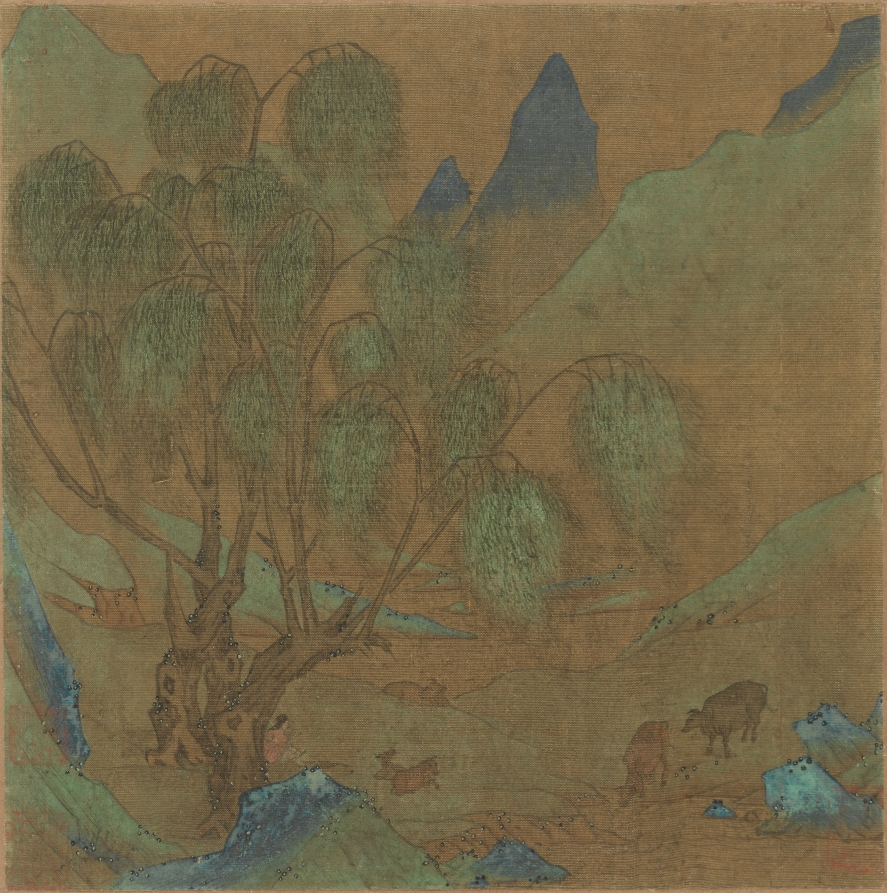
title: A Pastoral Scene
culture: China, Yuan dynasty (1271-1368) ?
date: 1271–1368(?)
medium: Album leaf; ink and color on silk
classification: Painting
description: Landscapes painted in blue and green mineral pigments often allude to the past or to paradise. Here the color may suggest that surrounded by nature, the figure can escape the hassles of the chaotic world.